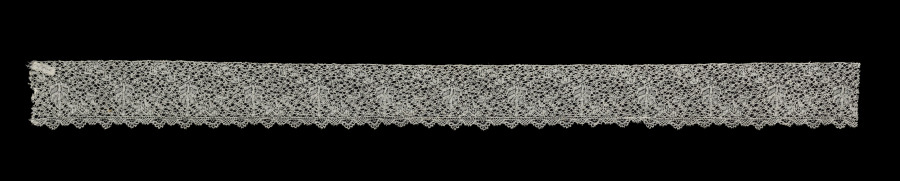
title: Lace Edging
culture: Belgium, Binche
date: 1700s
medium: Bobbin lace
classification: Lace